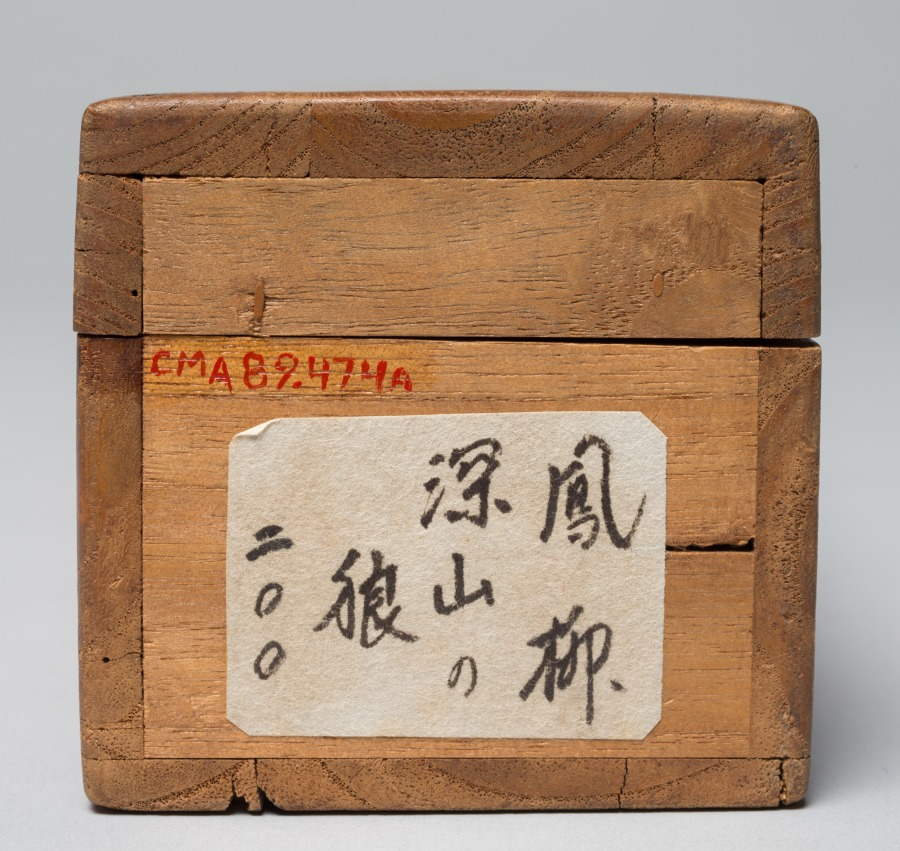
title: Howling Wolf in a Deep Mountain Valley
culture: Japan, Taishō period (1912–26)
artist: Yoshimura Hōryū (Japanese, 1874–1950)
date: 1912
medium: Hanging scroll; ink and color on silk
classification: Painting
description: A wolf howls beneath the tall pines in a misty landscape. The painter was born in the bustling city of Osaka in the Kansai region. He studied with Mori Jihō (1818–1891) and admired the Maruyama school of painters. He was especially gifted at depicting deer, monkeys, tigers, weasels, and other animals.